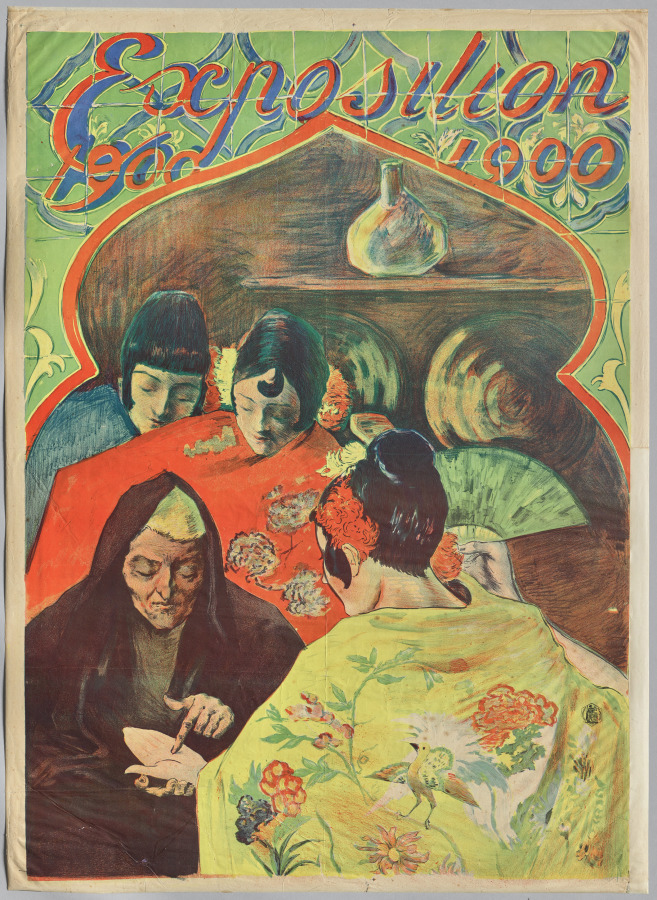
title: Exposition 1900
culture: France, Paris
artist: Alexandre Lunois (French, 1863–1916)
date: 1899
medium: color lithograph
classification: Print